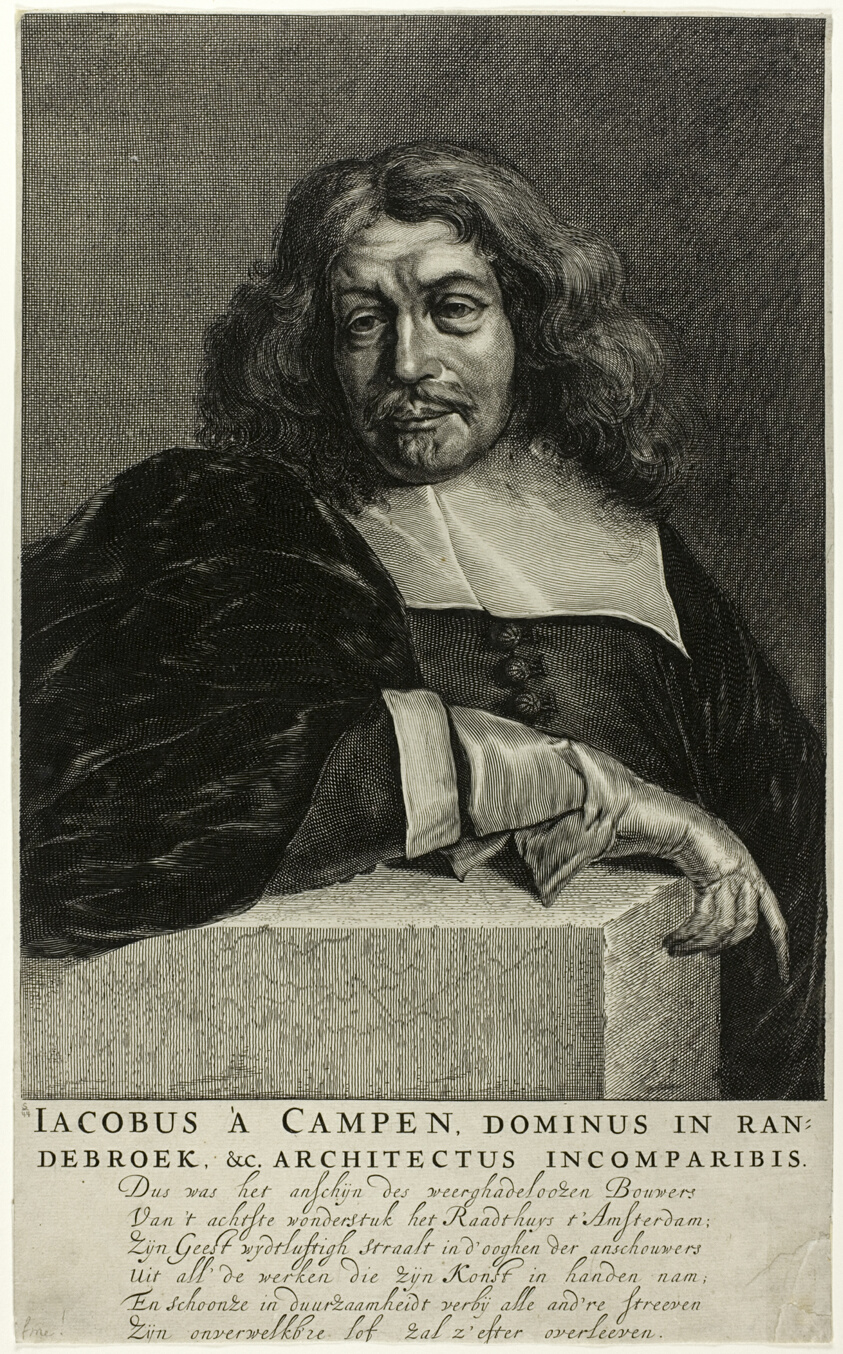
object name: Print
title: Portrait of Jacob van Campen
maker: Abraham Lutma (Dutch, active c. 1650); probably after Jan Lievens (Dutch, 1607-1674)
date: c. 1650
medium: Etching in black on ivory laid paper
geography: Netherlands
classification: etching; prints and drawing; print